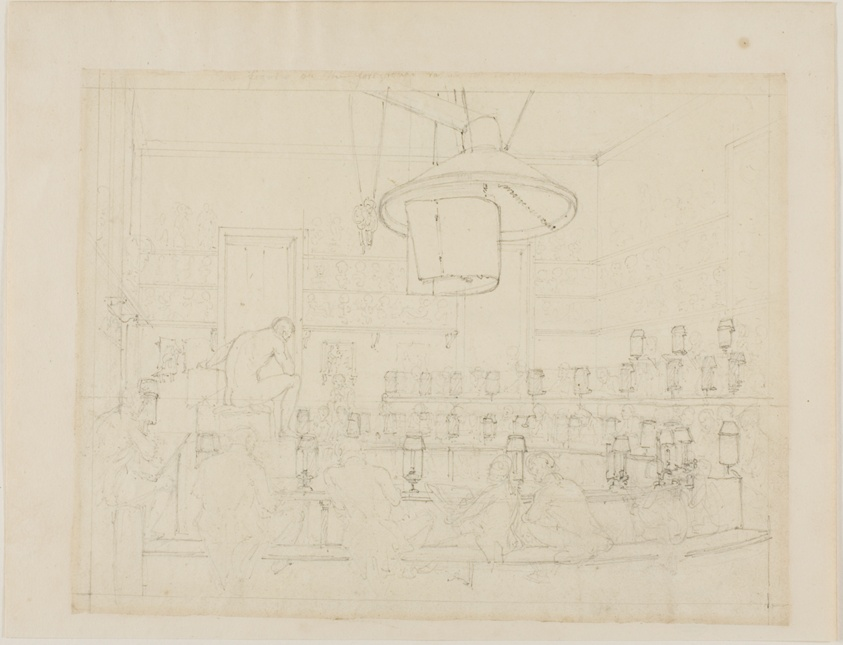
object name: Drawing and Watercolor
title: Study for Drawing from Life at the Royal Academy, Somerset House, from Microcosm of London (recto); Study for Drawing from Life at the Royal Academy, Somerset House, from Microcosm of London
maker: Augustus Charles Pugin (English, born France, 1762-1832); Thomas Rowlandson (English, 1756-1827)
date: c. 1808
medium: Graphite (recto and verso) on cream wove paper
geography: England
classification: graphite; drawings (visual works); prints and drawing